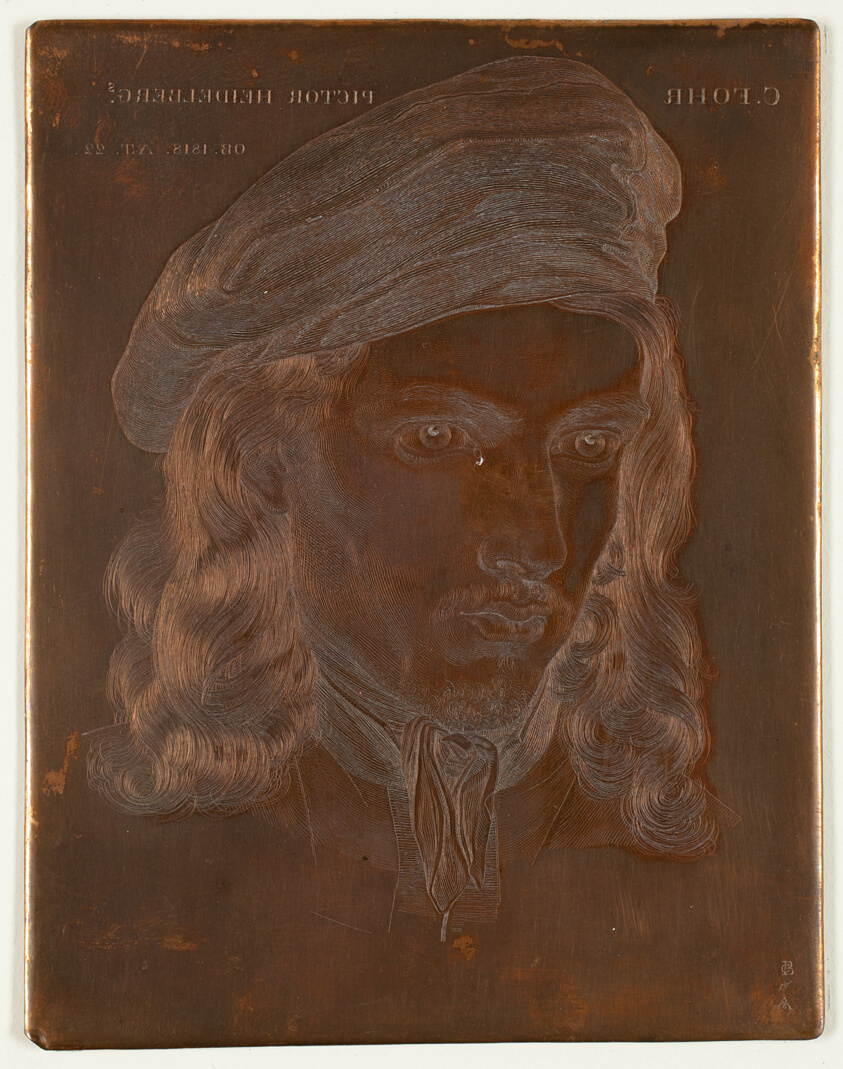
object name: Print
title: Portrait of Carl Phillip Fohr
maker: Samuel Amsler (Swiss, 1791-1849); after Carl Barth (German 1896-1976)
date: 1818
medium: Copper plate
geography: Switzerland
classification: engraving; matrix; print; prints and drawing